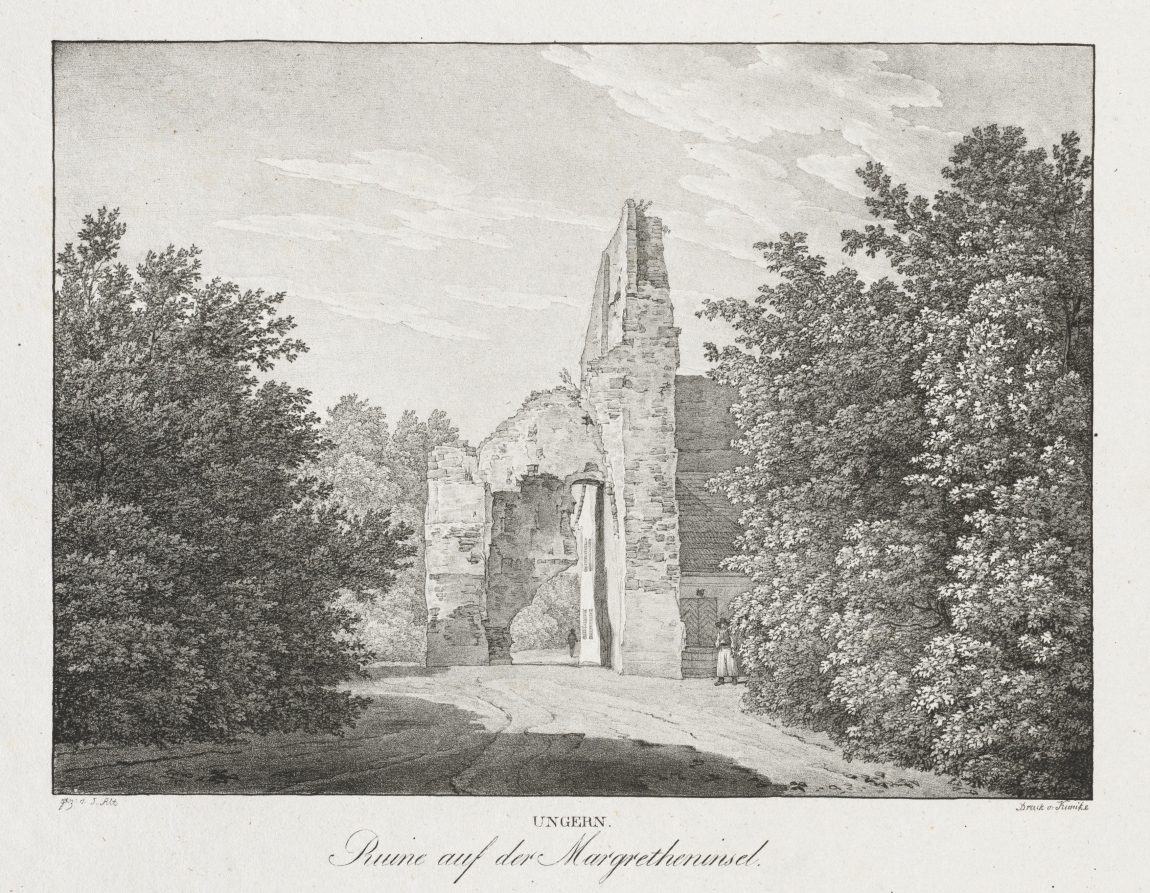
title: Ungern, Ruinen auf der Margretheninsel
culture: Austria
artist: Jakob Alt (Austrian, 1789–1872)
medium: lithograph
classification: Print